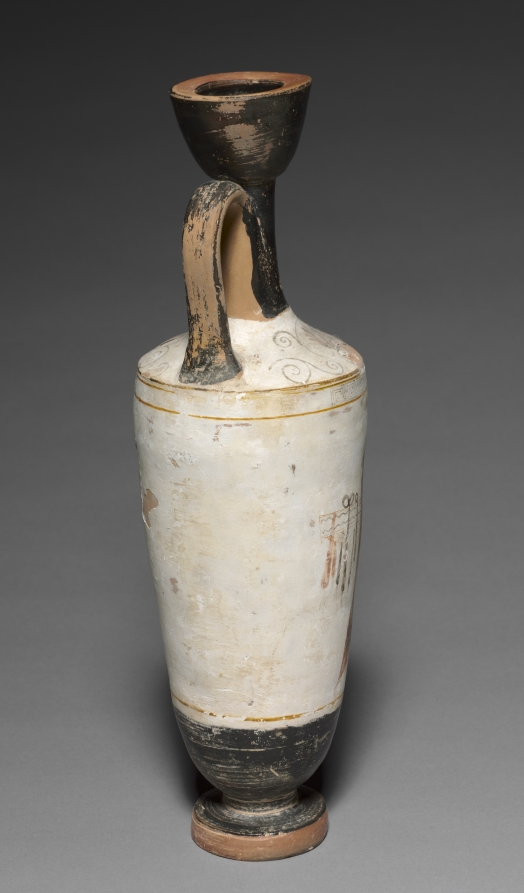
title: White-Ground Lekythos (Oil Vessel): Mourners at Tomb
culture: Greek, Attic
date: c. 400s BCE, with modern painting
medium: ceramic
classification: Ceramic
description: In its basic shape and decorative scheme—three figures before a stepped tomb marker—this lekythos resembles hundreds of funerary vessels made in Athens during the fifth century (400s) BC. But unusual features of the painted decoration, including the multicolored palmettes on the shoulder, and the shoes worn by the youth, suggest a modern intervention. Zinc found in analysis of the white ground is also likely modern, although the vessel itself may be ancient.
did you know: Both stylistic and technical studies suggest that this vase is not wholly ancient.